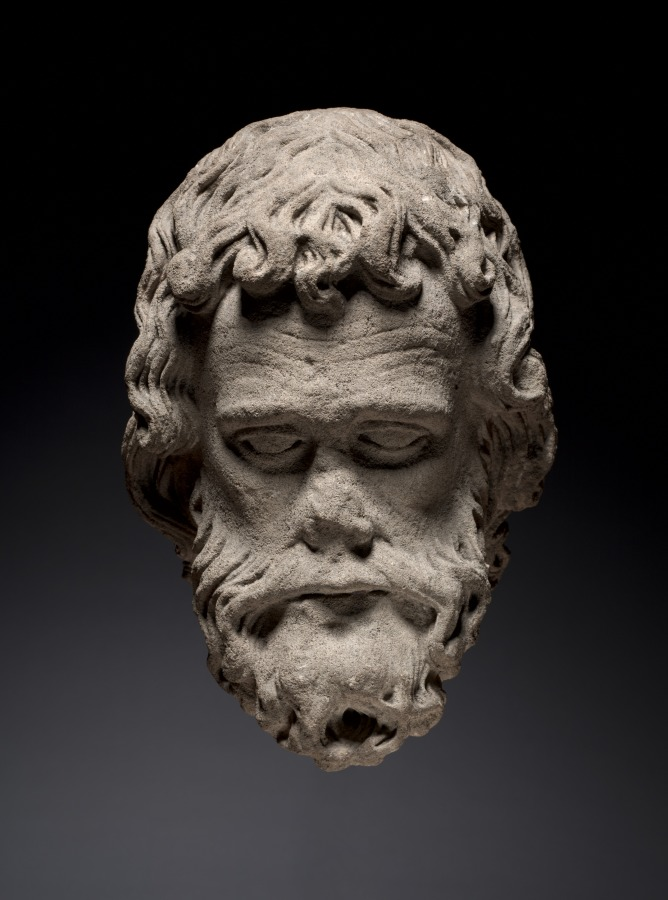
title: Head of an Apostle from the South Portal of the Cathedral of Thérouanne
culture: Northern France (Pas-de-Calais), Thérouanne, 13th century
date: c. 1235–1240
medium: oolitic limestone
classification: Sculpture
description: These monumental stone heads are among the substantial known remains of the sculptural program of Thérouanne’s cathedral, which was razed to the ground by Emperor Charles V of Spain in June of 1553. These heads were found in a wall of rue Ste. Croix in the town of Saint Omer (a short distance to the north) in January 1923. This group of sculptures from the gable of the south portal of Thérouanne, which includes a stylistically related Christ as Judge, is recorded to have been moved to the Cathedral of Saint Omer in 1554. With their deeply carved wavy hair, curly beards, wrinkled foreheads, and ponderous facial features, these imposing heads--even in their now fragmentary and weathered state--attest to the powerful monumentality of the stone sculpture covering French church facades of the Gothic period.